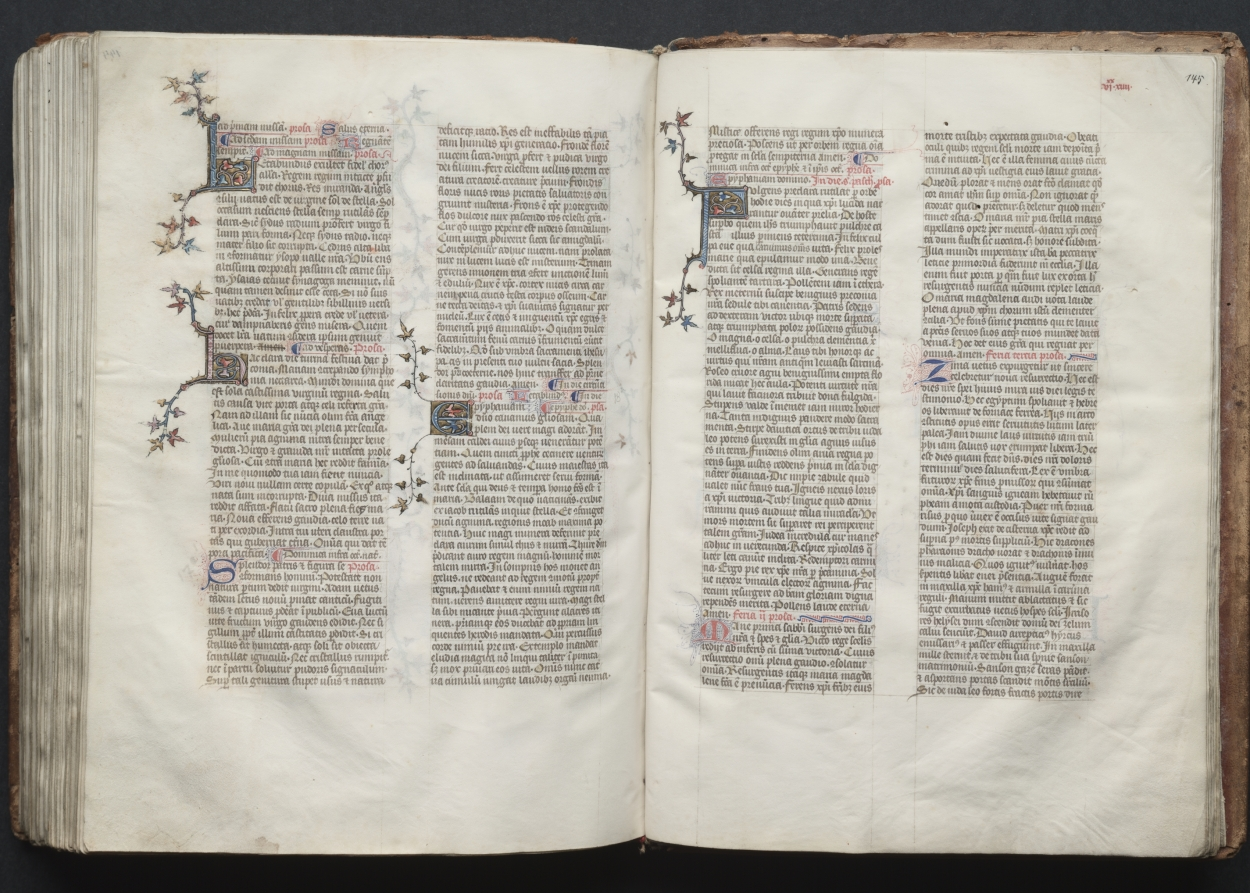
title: The Gotha Missal: Fol. 145r, Text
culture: France, Paris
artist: Master of the Boqueteaux (French)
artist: and Workshop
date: c. 1375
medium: ink, tempera, and gold on vellum; blind-tooled leather binding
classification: Bound Volume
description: The style and quality of this manuscript's decoration is typical of deluxe Parisian books made for aristocratic or royal patrons. Most of the book's decoration appears to be the work of the Master of the Boqueteaux, an artist active at the court of King Charles V (died 1380). His style was apparently shared by a number of book illuminators working in and around Paris. It is very possible that the Gotha Missal belonged to Charles V, but is not provable because the manuscript has no royal portraits and lacks a colophon. Given the book's magnificent decoration, however, it would seem that it was produced for a Valois prince, if not for the king himself. The manuscript receives its name from the German dukes of Gotha, its later owners.